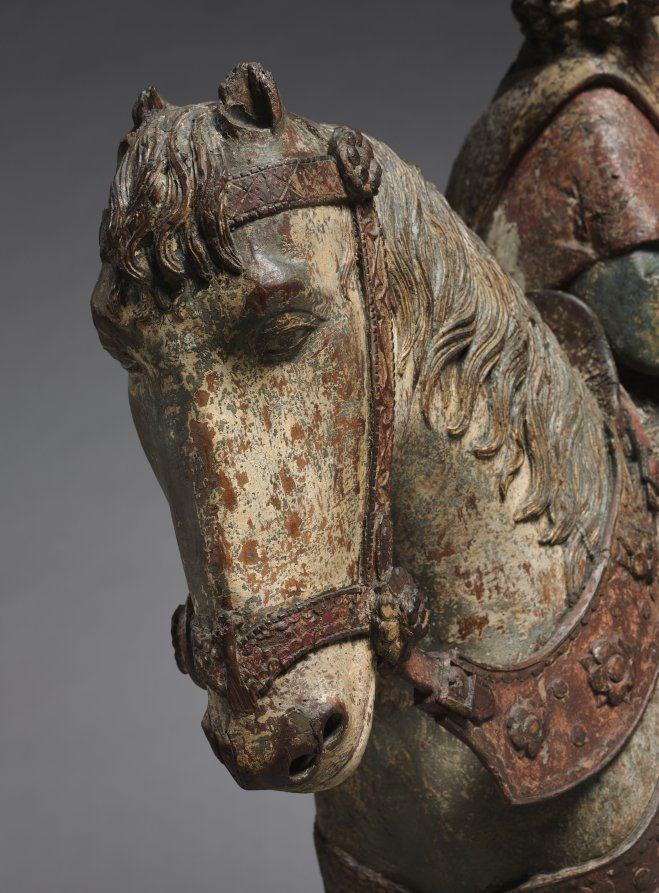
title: Saint Martin of Tours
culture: Northeast France or Flanders, 15th century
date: c. 1480–1500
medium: polychromed walnut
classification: Sculpture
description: According to tradition, Saint Martin was born during the reign of Constantine the Great (306–37 CE) and served as a member of the Roman cavalry in Gaul. There he earned a reputation for humility and boundless charity. During the severe winter of 322 CE at Amiens, Martin's compassion for others led him to divide his cloak with his sword, and to give half to a poor, naked beggar. This event, along with Martin's subsequent vision of the beggar as Christ, eventually led to the saint's widespread popularity throughout medieval Europe. Saint Martin was particularly venerated in the city of Tours where he served as bishop, where his tomb is located, and of which he remains the patron saint.